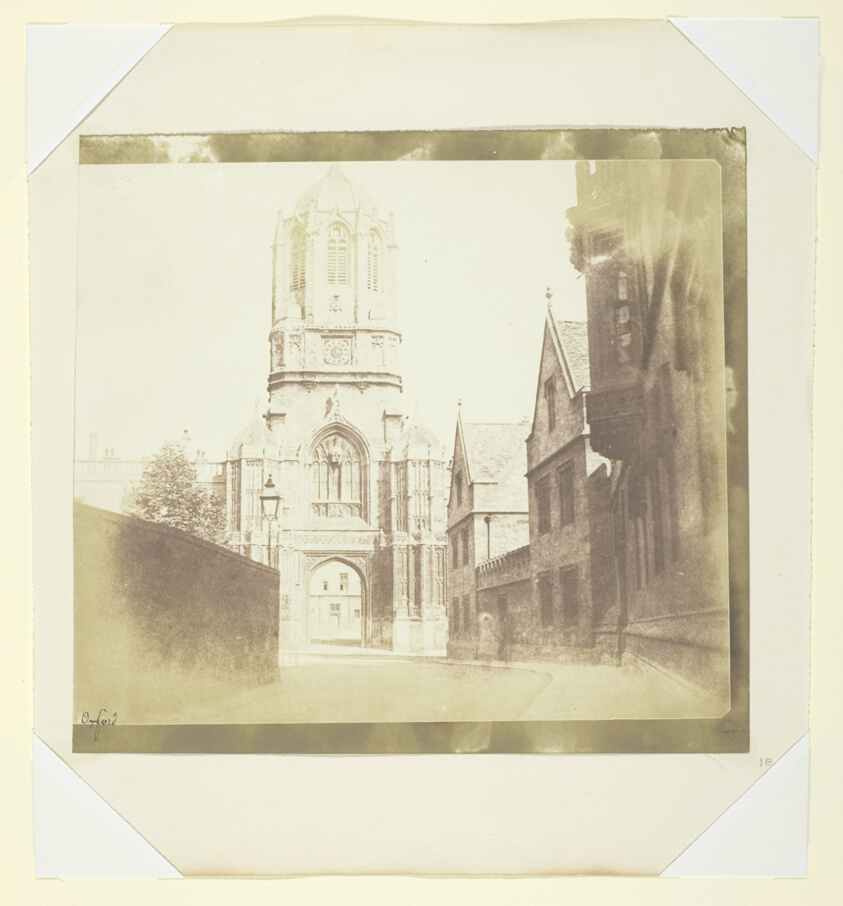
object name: Photograph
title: Gate of Christchurch, Oxford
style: 19th century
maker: William Henry Fox Talbot (English, 1800–1877)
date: c. 1844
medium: Salted paper print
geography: England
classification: salted paper print; photographic process; photography; photograph